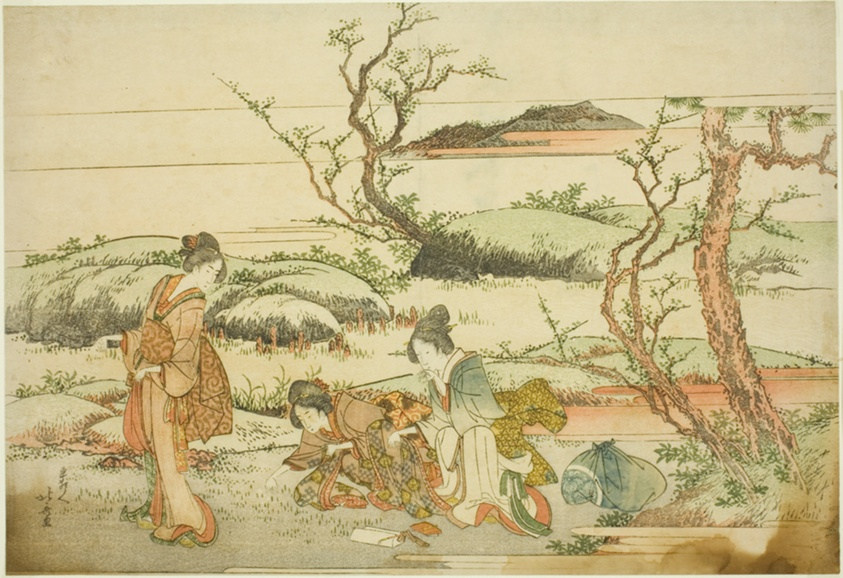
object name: Print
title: Gathering spring greens, from the album "Fuji in Spring (Haru no Fuji)"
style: Japanese (culture or style)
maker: Katsushika Hokusai 葛飾 北斎; Japanese, 1760-1849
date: 1803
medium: Color woodblock print; double-page illustration from book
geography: Japan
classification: woodblock print; print; asian art